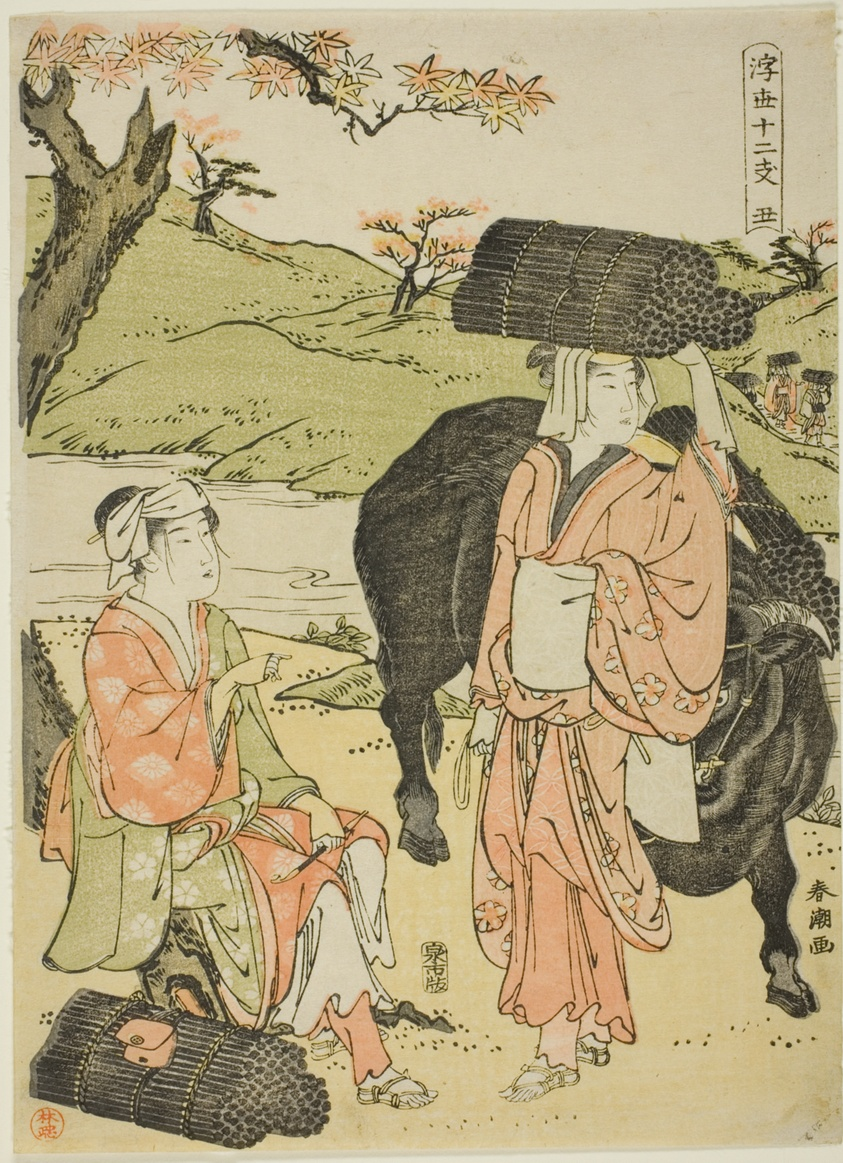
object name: Print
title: Ox (Ushi), from the series "Twelve Hours of the Floating World (Ukiyo juni shi)"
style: Japanese (culture or style)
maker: Katsukawa Shuncho; Japanese, active c. 1780-1801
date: c. 1780/1801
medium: Color woodblock print; oban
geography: Japan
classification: woodblock print; print; asian art